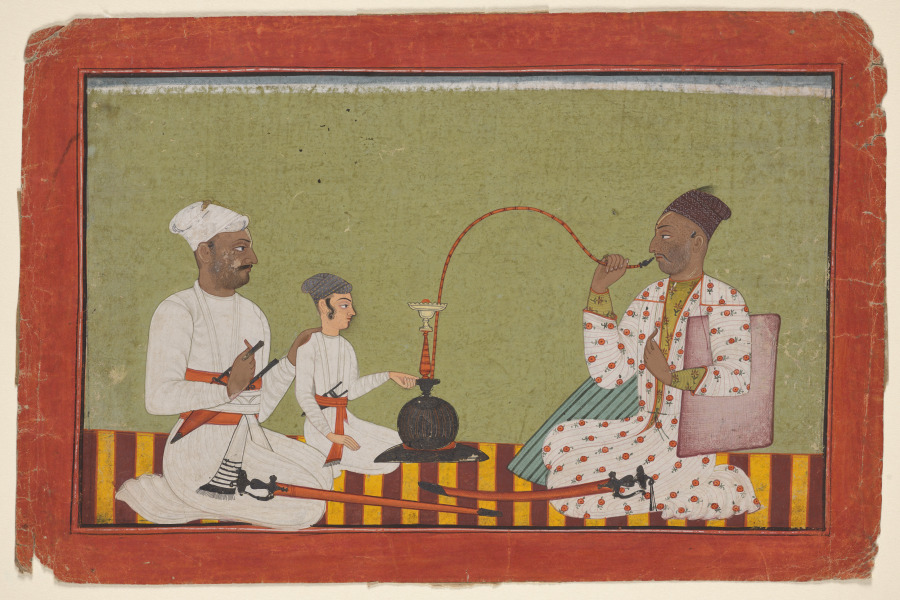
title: Posthumous portrait of Raja Chhatar Singh of Chamba smoking a hookah with his brother and son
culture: Northern India, Pahari kingdoms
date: c. 1700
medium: Gum tempera and ink on paper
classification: Painting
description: King Chhatar Singh (reigned 1664–90), his thinning facial hair shot through with gray, points to his heart, a gesture common in images of the deceased. With his right hand he grasps the pipe of a hookah, connecting him to his son Udai Singh, who holds the rim of its base. The king’s sword points directly to the boy, further linking them visually. Since hookah smoking connoted elite royal status in Pahari portraiture, this image suggests the passing of power from father to son.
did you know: The back of this painting is lined with reused ledger paper.